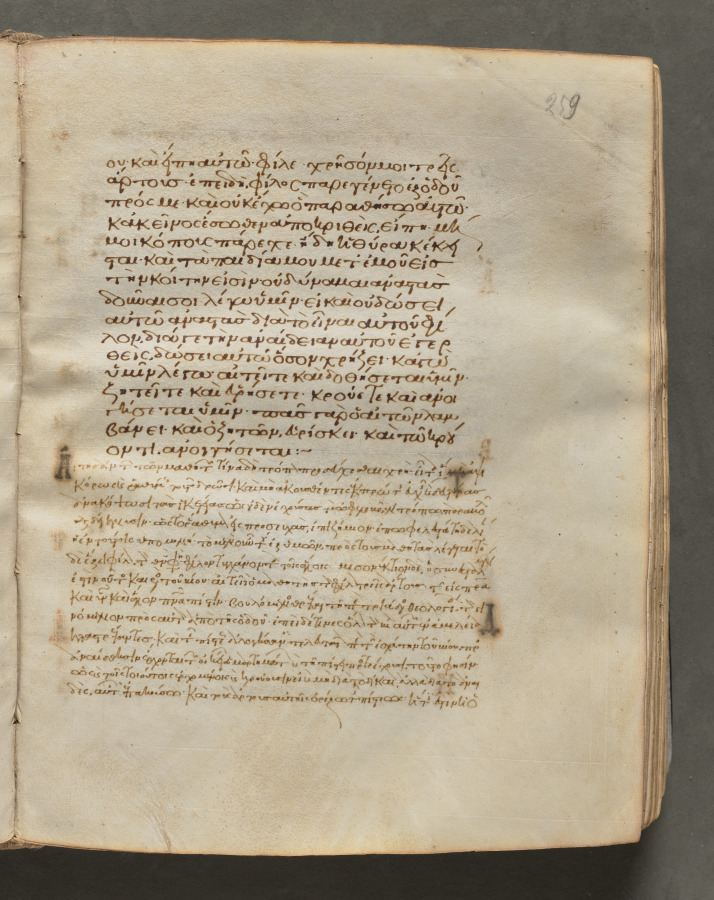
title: Text, folio 259 (recto), from a Gospel Book with Commentaries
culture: Byzantium, Constantinople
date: c. 1000–1100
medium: ink, tempera, and gold on vellum; leather binding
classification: Bound Volume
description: Each of the four gospels in this book opens on a page with brilliantly illuminated borders depicting the author of the text as well as birds—principally peacocks, symbols of the immortality of the soul—and fountains, representing the fountain of life and the salvation of the soul. This volume consists of 428 leaves with texts in Greek. Its level of sophistication suggests that it was probably written and decorated in a monastery in Constantinople.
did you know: Gospel books were carried in procession through Byzantine churches.